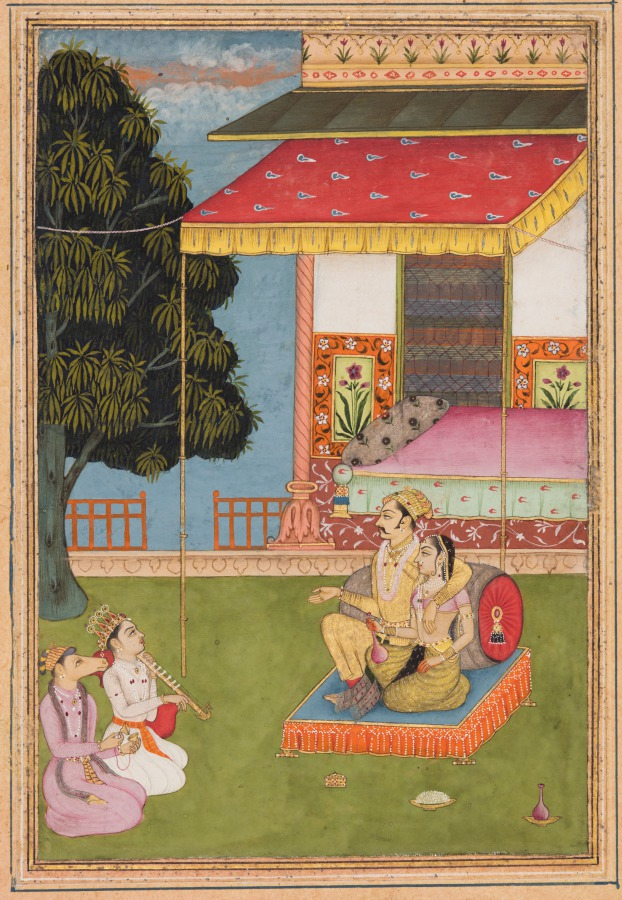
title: Shri Raga, from a Ragamala (Garland of Melodies)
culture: Northwestern India, Rajasthan, Rajput Kingdom of Bikaner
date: 1695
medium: Gum tempera and gold on paper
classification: Painting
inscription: In Nagari on top border ‘srī rāgā’ and Persian number ‘31’. Inscribed ‘śrī rāgā’ in Nagari with Nagari number ‘31’ on verso.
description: Sharing a bottle of wine, the royal couple enjoy the performance of a musician playing a vina and the horse-headed divinity Tumbaru on the cymbals. Tumbaru is a divinity who has the power to increase the prosperity of the realm. This page is from a series that was made on the occasion of Diwali, the Hindu festival of lights.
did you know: The ideal king in this scene is a likeness of the current ruler, Anup Singh (r. 1638–93).